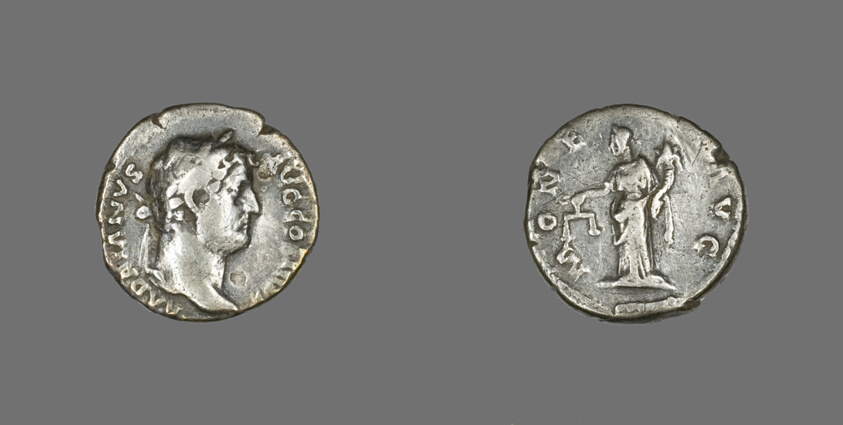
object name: Coin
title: Denarius (Coin) Portraying Emperor Hadrian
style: roman (ancient, style or period)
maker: Roman, minted in Rome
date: 134-138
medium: Silver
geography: Roman Empire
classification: coin; ancient art